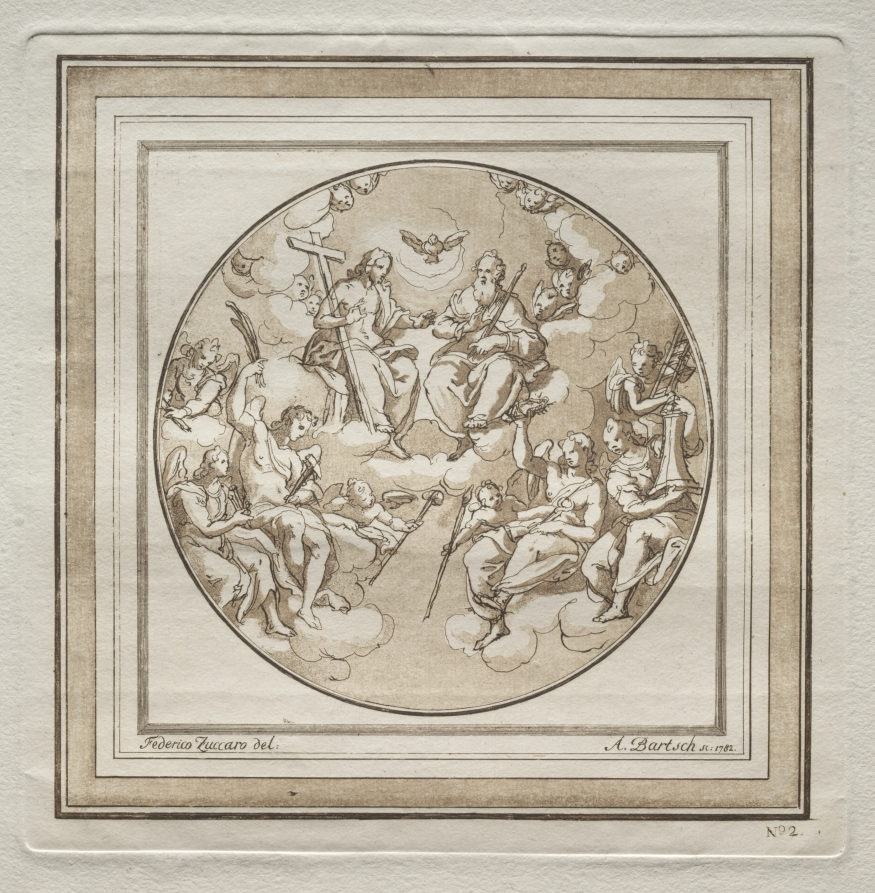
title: The Trinity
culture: Austria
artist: Adam von Bartsch (Austrian, 1757–1821)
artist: after Federico Zuccari (Italian, 1540/43–1609)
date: 1782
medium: etching and aquatint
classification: Print